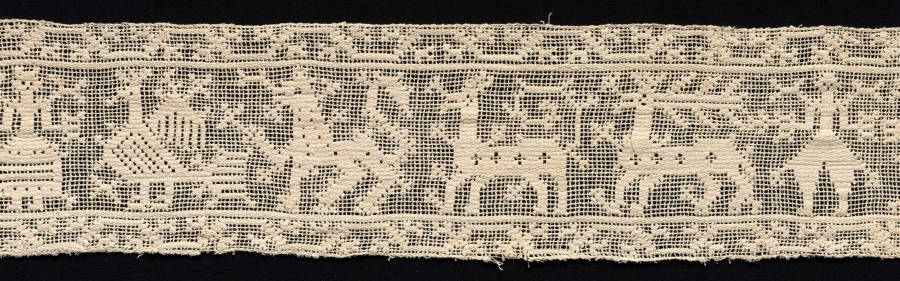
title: Band with Parade of Human Figures, Stags, and Other Fantastic Animals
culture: Italy, Sicily ?, 1500s-1600s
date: 1500s-1600s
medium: Bleached linen (est.): needle lace, burato (twined ground and darned in one direction)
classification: Lace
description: Animals viewed in profile, some with their legs raised, indicate movement, such as a parade or procession. However, the human figures are shown frontally. Linear elements protruding from their backs and hands held out and open suggest the figures may be angels modeling a gesture of prayer.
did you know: Myrta Leonora Jones, the donor of this lace, was a women’s rights activist in Cleveland in the early 1900s.